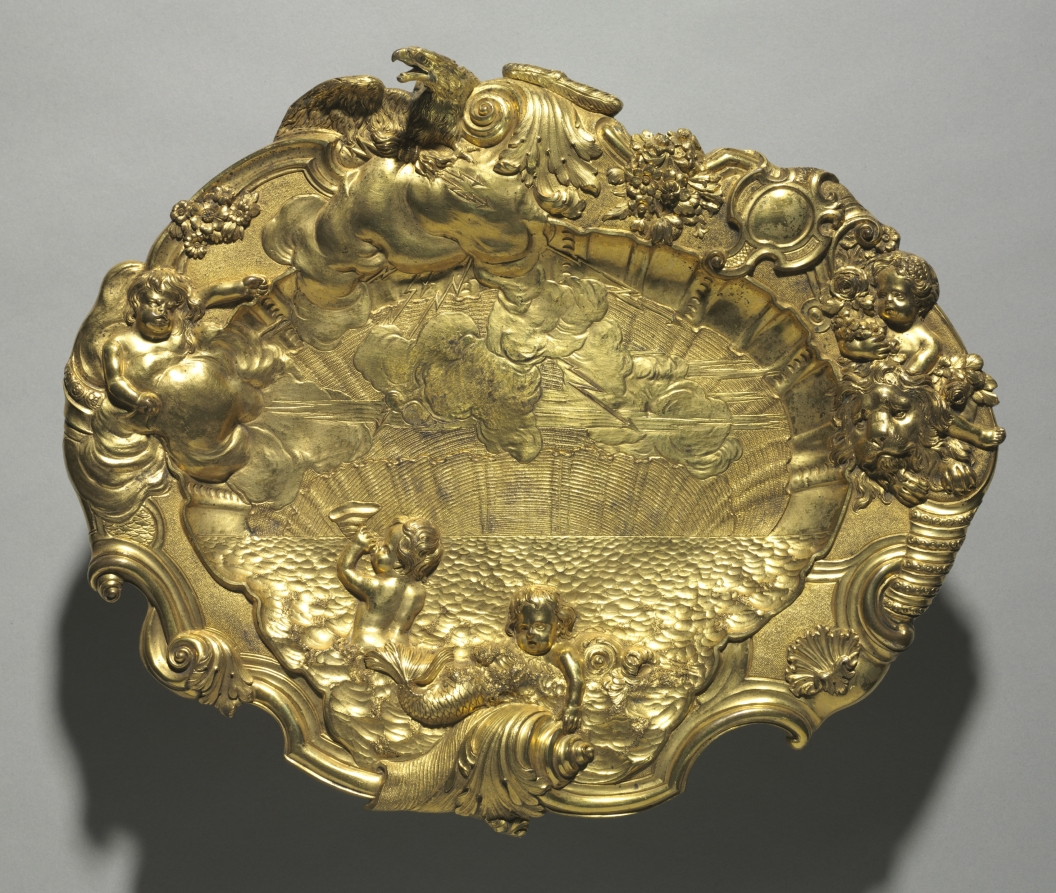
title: Basin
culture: England or Germany, 18th century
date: c. 1725–40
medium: gilt bronze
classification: Metalwork